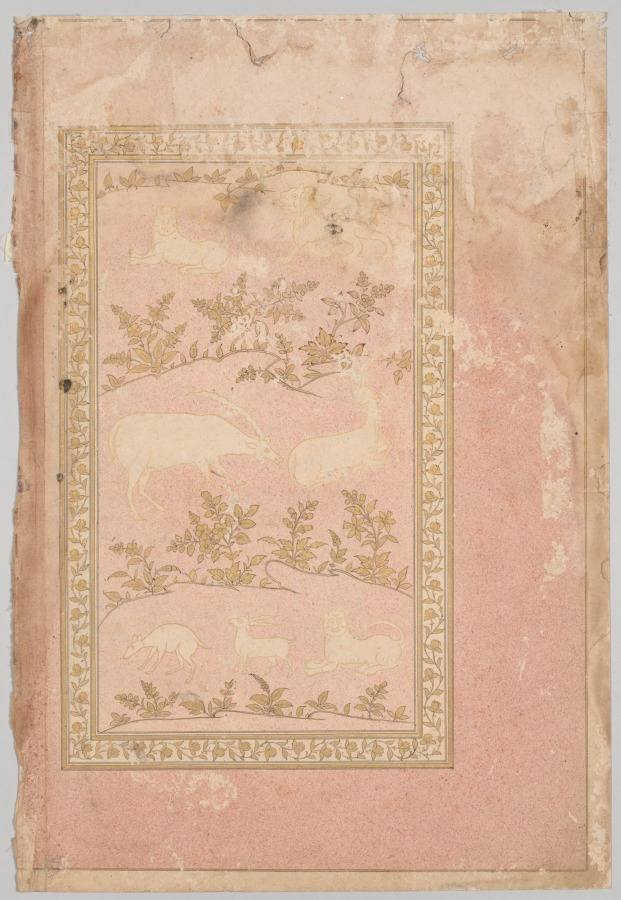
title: Stenciled Scenes of Lion and Gazelle (verso)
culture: Mughal India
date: c. 1710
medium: Ink and gold on paper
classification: Painting